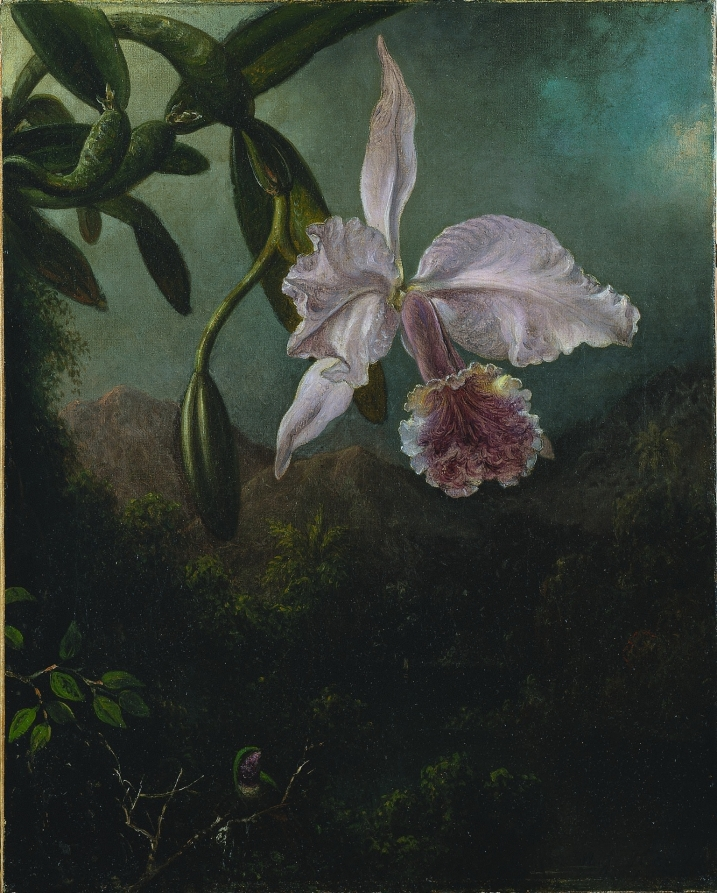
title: Orchid Blossoms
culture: America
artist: Martin Johnson Heade (American, 1819–1904)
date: 1873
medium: oil on canvas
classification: Painting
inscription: signed lower right: M.J. Heade / 1873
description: At the time he created this work, Martin Johnson Heade had made three trips to Central and South America. As an outgrowth of these experiences, he made a large number of paintings of birds and flowers, especially orchids, in a tropical setting.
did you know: Ten years after painting Orchid Blossoms, artist Martin Johnson Heade married at the age of 64.